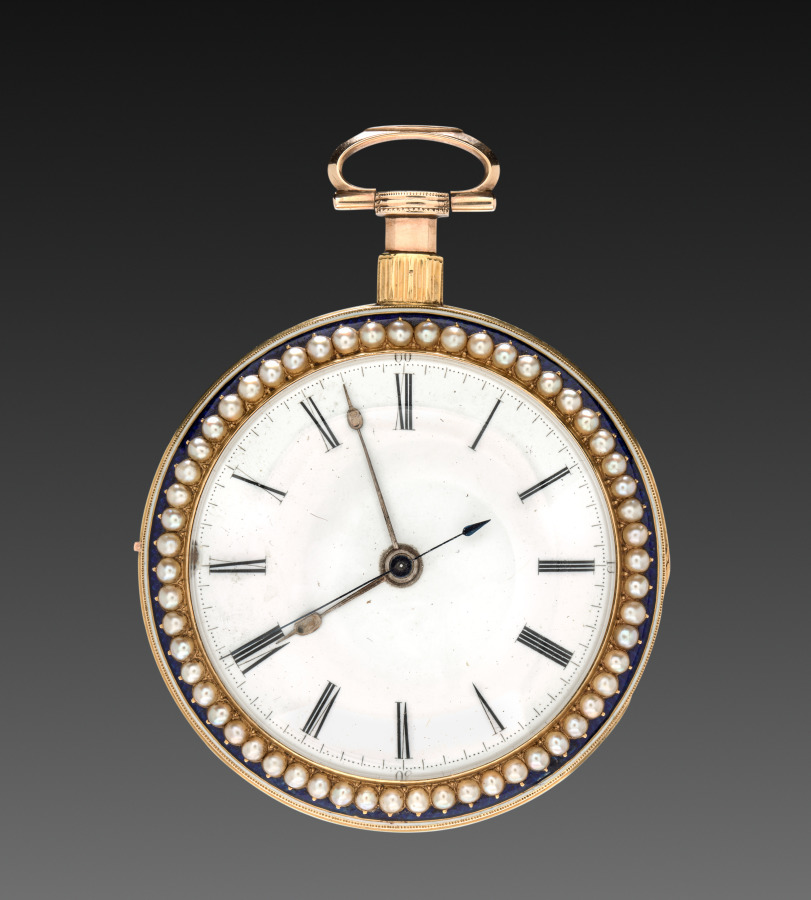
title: Watch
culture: England, 19th century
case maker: John Ray (British)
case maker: James Montague (British)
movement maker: Just and Son (British)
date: 1813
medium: gold, silver, pearls, diamonds, and enamel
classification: Jewelry